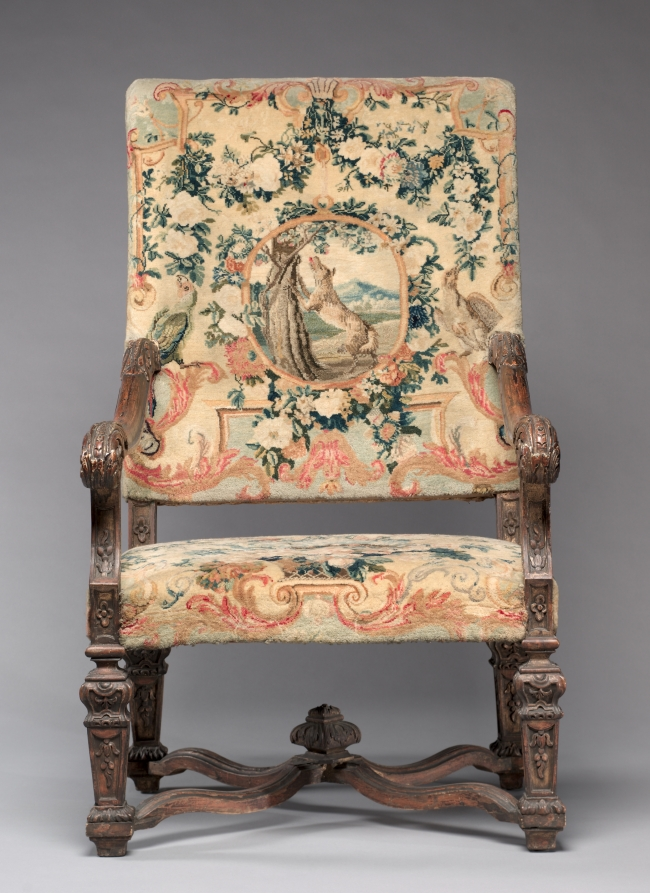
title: Armchair (3 of 4)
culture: France, 18th century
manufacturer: Royal Savonnerie Manufactory, Chaillot Workshops (French, est. 1627)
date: before 1717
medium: carved wood, Savonnerie knotted-pile (symmetrical rug knot) upholstery; wool, hemp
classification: Furniture and woodwork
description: These chairs belong to a suite that includes a settee (also in the CMA’s collection) and a tapestry made for a count and countess to mark their wedding in 1717. Furniture of this scale was usually placed against the wall in grand reception halls, more as a display of wealth than for use. Upholstered in Savonnerie tapestries, this suite was among the most treasured and expensive example anyone could own and typically reserved for royalty. To add decorative and intellectual interest to the textiles, weavers incorporated symbols depicting various stories from the Fables of Jean de La Fontaine, published from 1668 to 1694 and largely adapted from Aesop and other early storytellers.